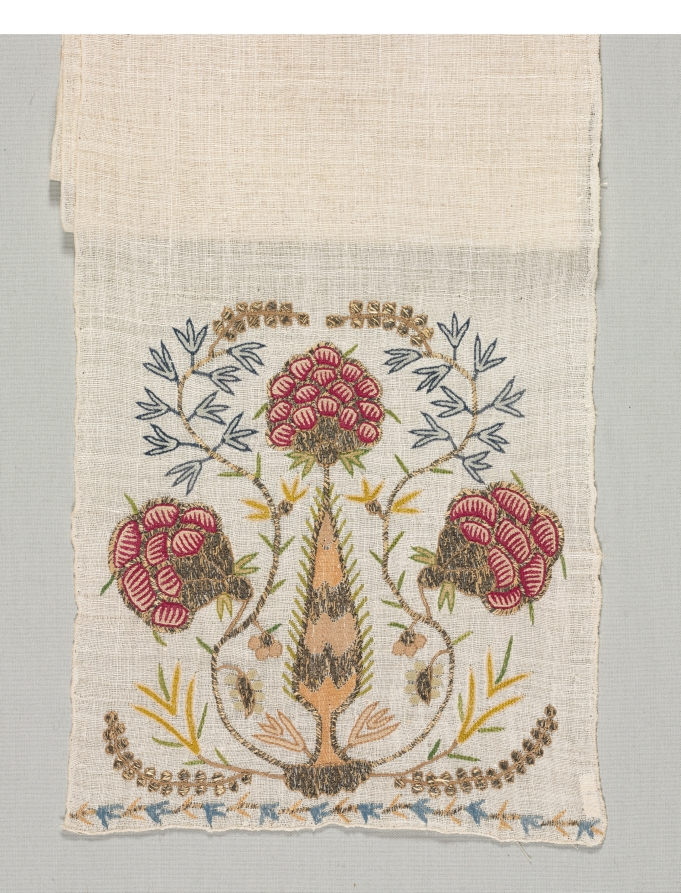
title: Embroidered Sash (Uckur)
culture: Turkey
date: 1700s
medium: embroidery: silk and silver filé on linen tabby ground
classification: Embroidery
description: Each end of the sash is embroidered with a single motif of large-scale flowering plants. Below the main motif is a stylized foliate device forming a narrow border.